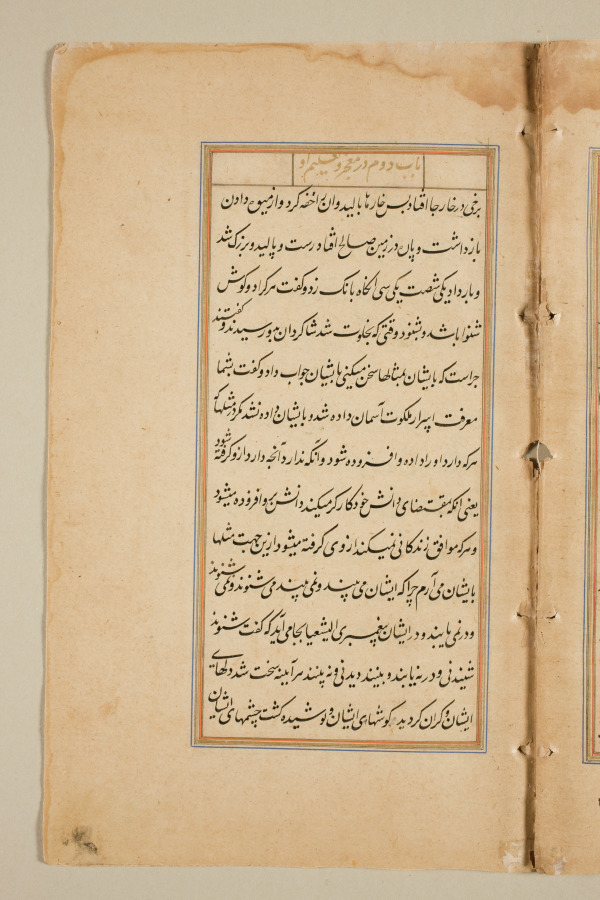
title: Text page from a Mirror of Holiness (Mir’at al-quds) of Father Jerome Xavier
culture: Mughal India, Allahabad, made for Prince Salim (1569–1627)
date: 1602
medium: Ink and gold on paper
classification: Manuscript